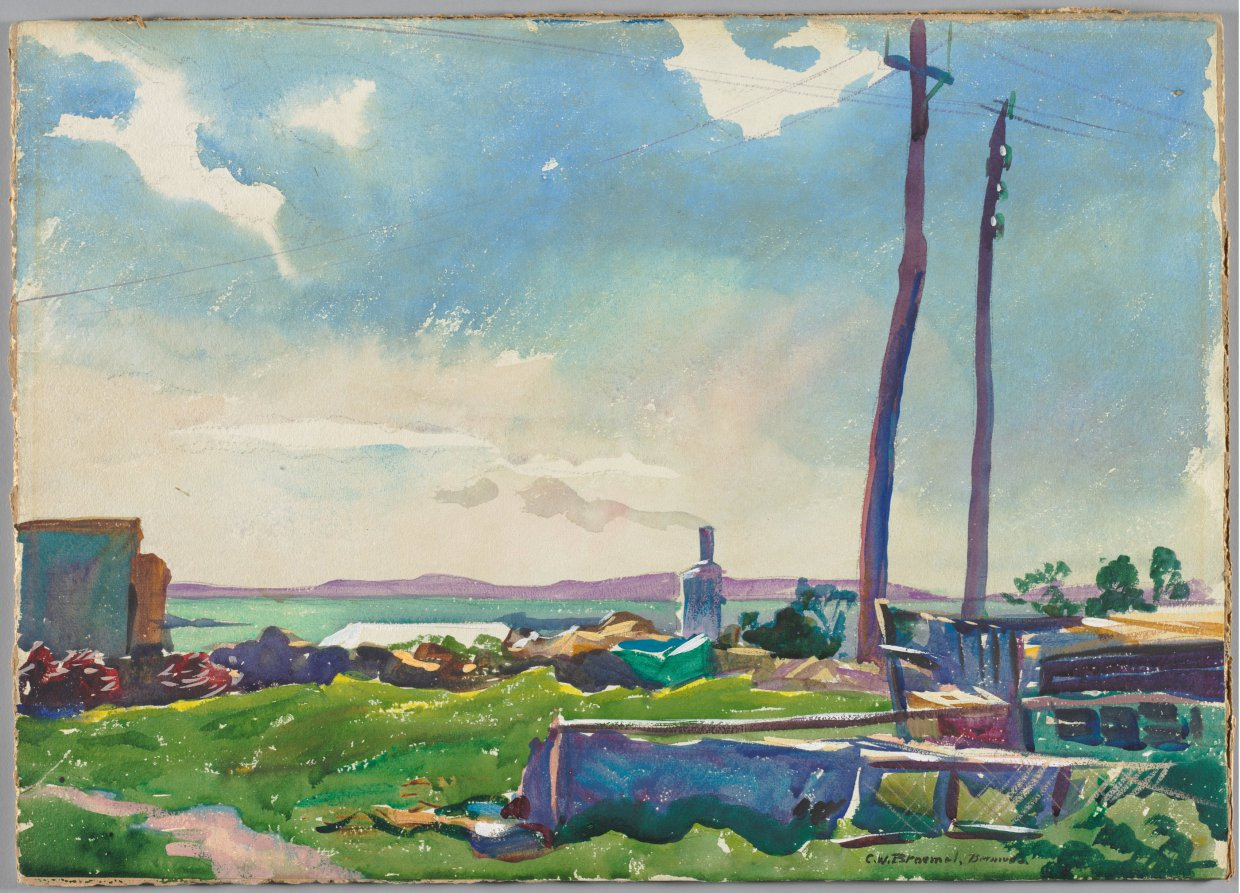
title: Air and Sunshine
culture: America, Ohio, Cleveland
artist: Carl William Broemel (American, 1891–1984)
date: 1924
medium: watercolor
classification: Drawing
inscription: Signed C.W. Broemel lower right corner